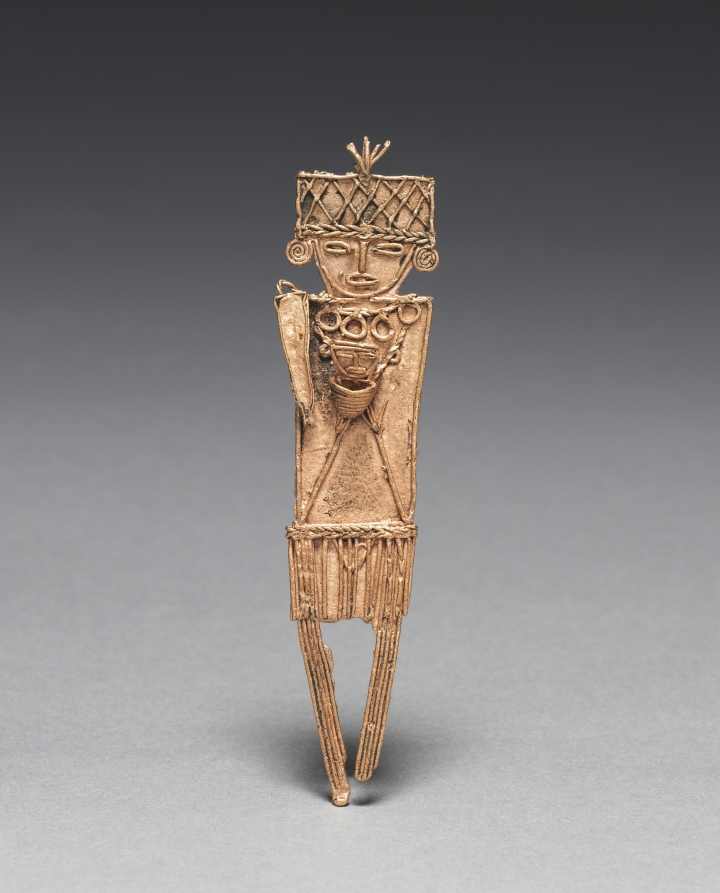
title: Tunjos (Votive Offering Figurine)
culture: Colombia, Muisca style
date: c. 900–1550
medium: cast gold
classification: Metalwork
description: Unlike the other gold ornaments made in the isthmian region, tunjos were not worn; instead, they served as offerings that were deposited in sacred places such as lagoons and caves. They often depict humans who hold something. Perhaps because they were not meant for display, tunjos were not finished after lost-wax casting. Flaws remain uncorrected, surfaces are unpolished, and gold that backed into the channel used to pour the molten metal into the mold was left in place.